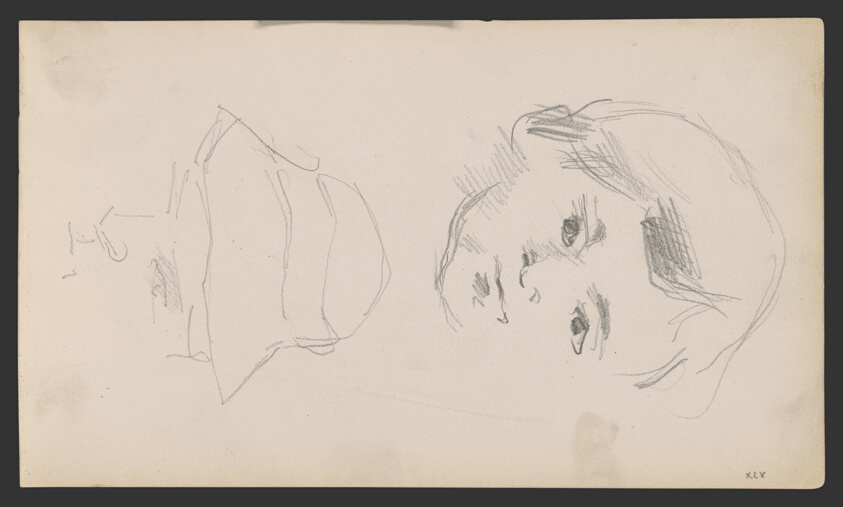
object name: Drawing and Watercolor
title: Sketchbook No. 2 (L'Estaque)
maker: Paul Cézanne; French, 1839-1906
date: 1875–86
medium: Graphite and pen and ink drawings on paper, bound into a book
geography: France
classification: sketchbook; graphite; prints and drawing; paper